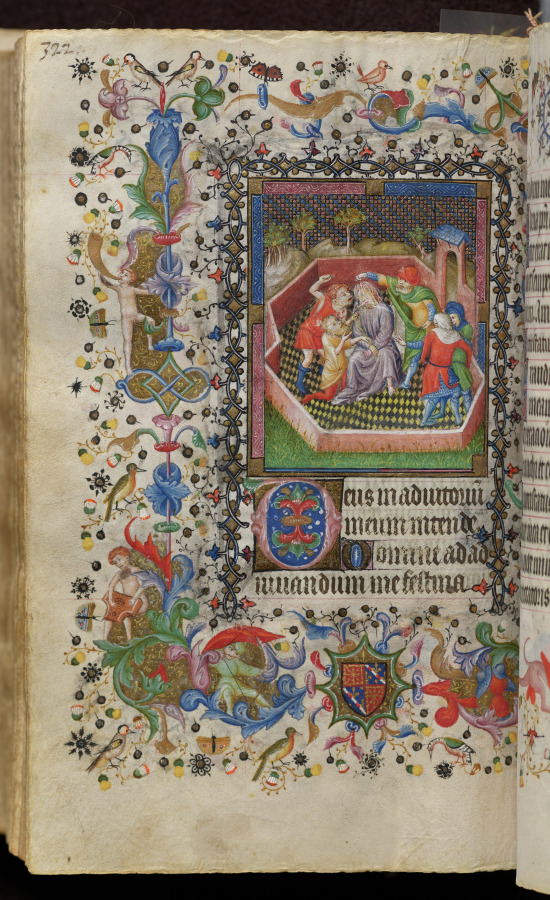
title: Hours of Charles the Noble, King of Navarre (1361-1425): fol. 161v, Mocking of Christ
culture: France, Paris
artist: Master of the Brussels Initials and Associates (French)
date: c. 1405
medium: ink, tempera, and gold on vellum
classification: Bound Volume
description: This precious volume was obviously highly prized by its owner, the French-born King of Navarre, who had his coat of arms painted on no less than twenty folios. Rather than directly commissioning this manuscript from a specific workshop, it seems that Charles the Noble acquired his book of hours -- perhaps ready-made for the luxury market -- while on a trip to Paris in 1404-05. A collaborative effort, six painting styles are evidenced within the pages of this codex, those of two Italians, two Frenchmen, and two Netherlanders. The painter who was responsible for the planning and decoration of the book, and who produced seventeen of the large miniatures, was a Bolognese artist known as the Master of the Brussels Initials. His principal assistant, responsible for most of the borders, was a Florentine who signed his name "Zecho" da Firenze on folio 208 verso.